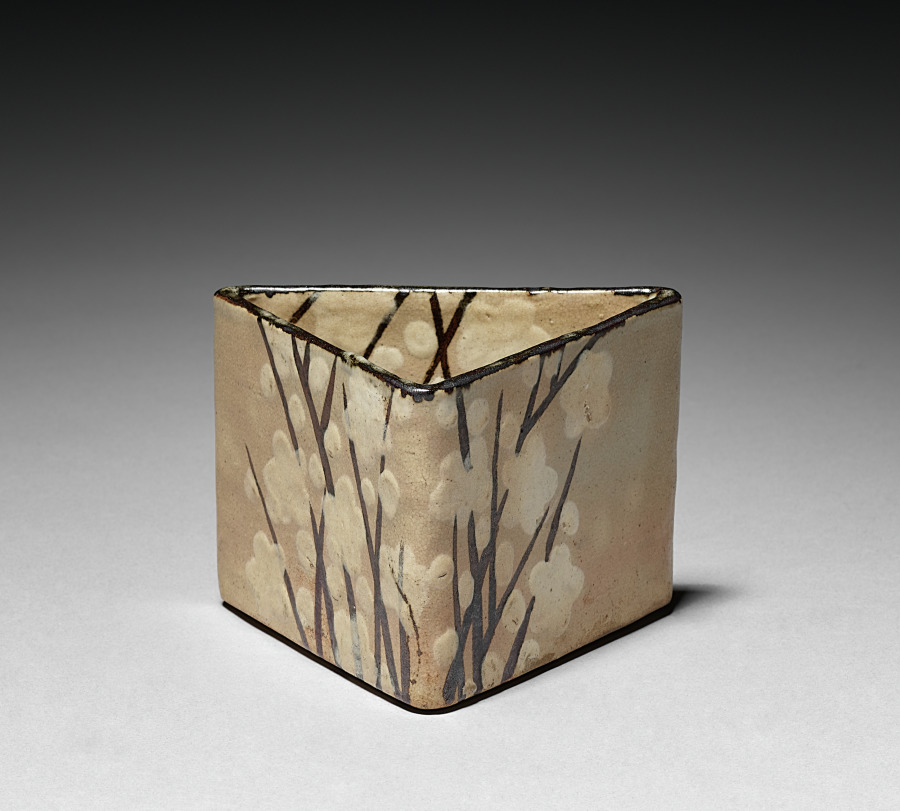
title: One of Five Serving Bowls (Mukozuke) with Prunus Design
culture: Japan, Edo period (1615–1868)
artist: school of Ogata Kenzan (Japanese, 1663–1743)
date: 1700s to mid-1800s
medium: Kyoto Ware: stoneware with underglaze iron oxide and slip decoration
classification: Ceramic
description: Note the rough, tan, clay bodies of these bowls with their deliberate irregularities. The design of branches was first painted in a black iron oxide, then the blossoms and buds in a white slip, followed by the application of a very thin transparent overglaze.